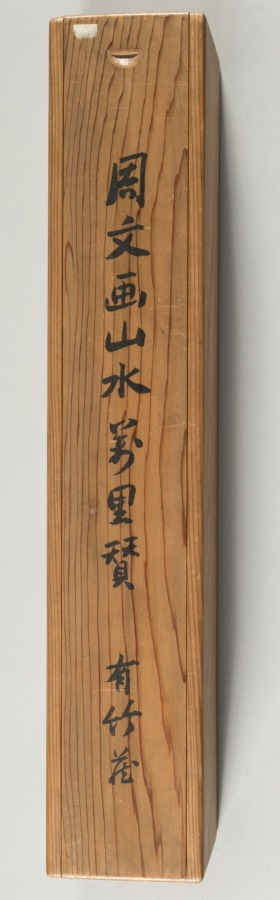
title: Lonely Temple and Towering Cliff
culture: Japan, Muromachi period (1392–1573)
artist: circle of Kenkō Shōkei (Japanese, active 1478–1506)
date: c. 1480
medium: hanging scroll; ink and slight color on paper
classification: Painting